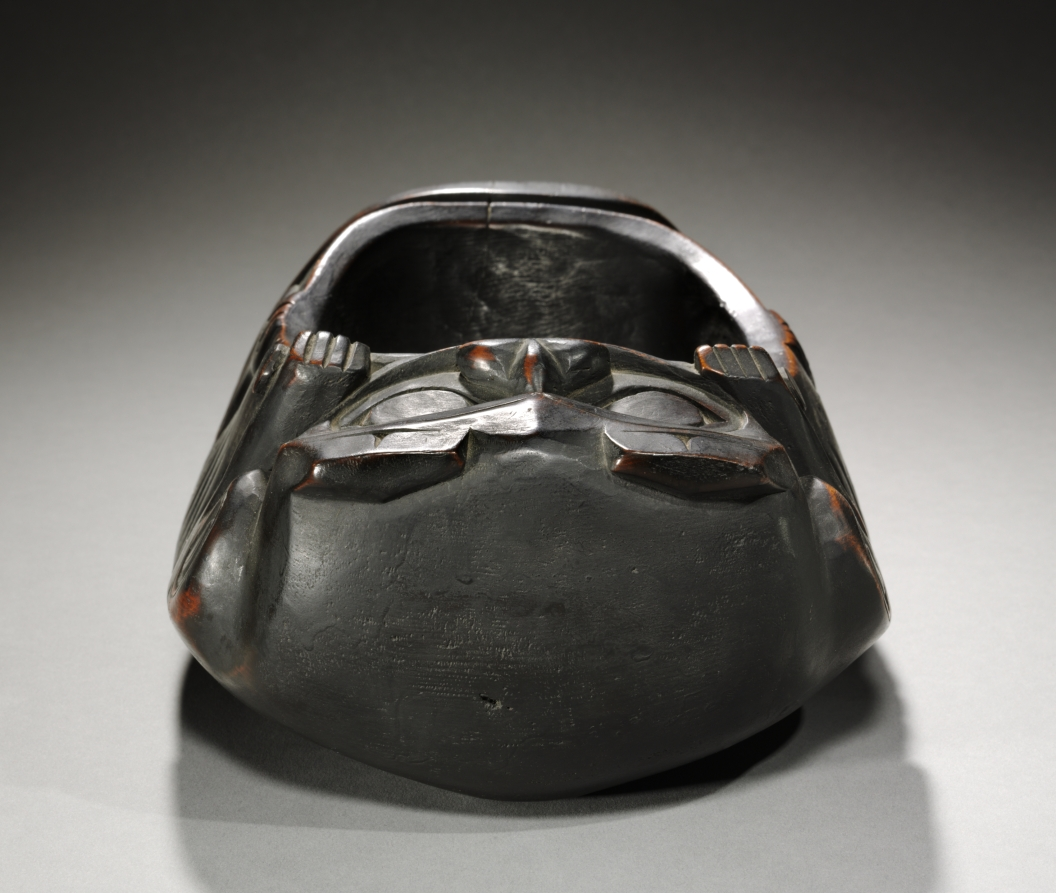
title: Beaver-Shaped Bowl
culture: Native North America, Northwest Coast, Alaska, Tlingit?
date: c. 1890–1920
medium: wood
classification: Wood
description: Bowls were a major Northwest Coast art form, used in many contexts including potlatch feasts that validated the rights and privileges of wealthy noble families. When Euro-American settlement forced a change from traditional to cash economies in the early 1900s, Indigenous carvers turned their skills to creating bowls like this example for the outside market.